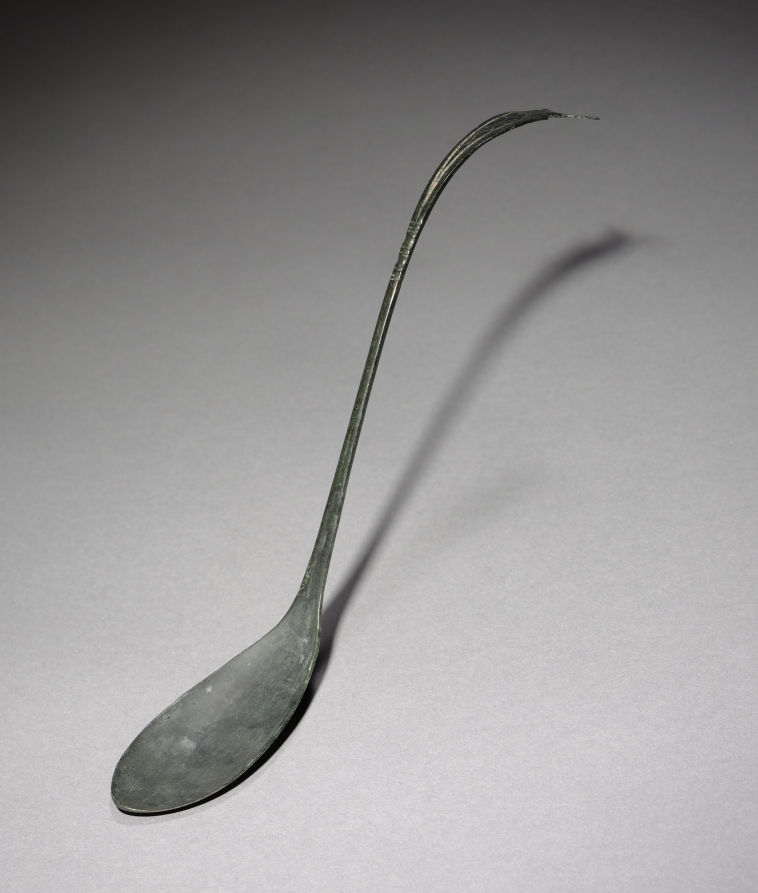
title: Spoon with Fish-Tail Design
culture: Korea, Goryeo dynasty (918–1392)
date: 918–1392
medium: bronze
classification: Metalwork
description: Many of Goryeo period spoons like this one feature a curved handle that splits into a jagged fishtail design. This fishtail design is not unique to Korea; it was also widely used in the area under the rule of two non-Han Chinese states: Liao (907–1125) and Jin (1115–1234). These seemingly ordinary objects testify to exciting material interactions between the Goryeo dynasty and non-Han Chinese northern states, which were often omitted from the official records.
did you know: Bronze spoons are the most common burial item. Scholars have proposed that toward the end of the 14th century, Koreans enjoyed meat-based soups more than any other dishes, explaining why spoons became common household items as well as burial goods.